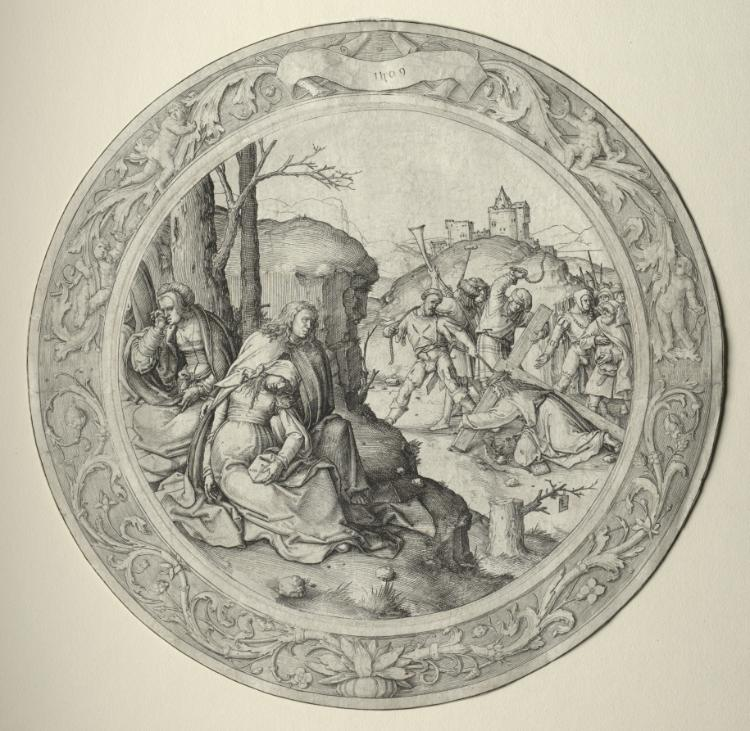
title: The Round Passion: Christ Carrying the Cross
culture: Netherlands, 16th century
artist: Lucas van Leyden (Netherlandish, 1494–about 1533)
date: 1509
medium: engraving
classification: Print